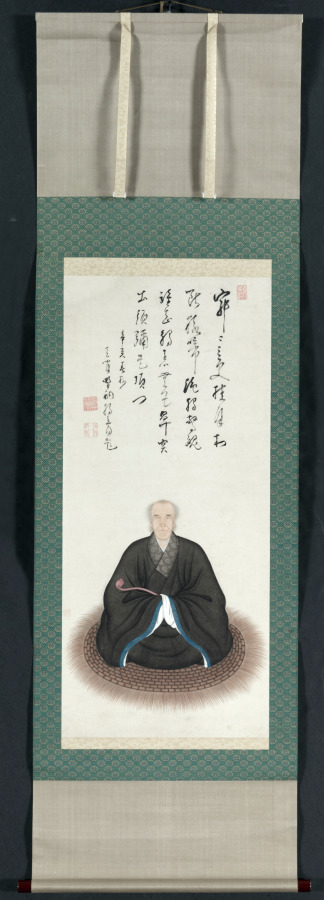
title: Portrait of Duli Xingyi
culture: Japan, Edo period (1615–1868)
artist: Kita Genki (Japanese, active c. 1664–98)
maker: Duli Xingyi (Chinese, 1596–1672)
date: 1671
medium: hanging scroll; ink and color on paper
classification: Painting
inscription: 1671 inscription at top of scroll by Duli Xingyi with three seals, 東矣䪩 (prefatory), 遺世獨立 (top) , 天外一閒人 (bottom); seal of Genki at lower left of painting 元規 .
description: In this portrait, the Ōbaku school Buddhist monk Duli Xingyi (born Tai Li, 1596–1672), whose name is pronounced Dokuryū Shōeki in Japanese, sits upon a woven mat holding a ceremonial scepter known as a ruyi, or nyoi in Japanese. Above his head is an insciption he added to the painting in 1671, the year before his death. It may be translated to read: Contemplative emptiness: the moon suspended over the village at midnight. Suddenly my soul is startled by the howl of an ape. Who could know that it would arouse me beyond my senses, and bring me an inner vision from Mt. Sumeru. (translated by Stephen Addiss and Kwan S. Wong) Originally from what is now the city of Hangzhou in China, Duli emigrated to Japan in 1653, where he took monastic vows. His skills in calligraphy and seal carving were formidable. Painter Kita Genki combined Chinese brush styles he learned in Nagasaki with Western painting techniques to capture Duli's likeness.